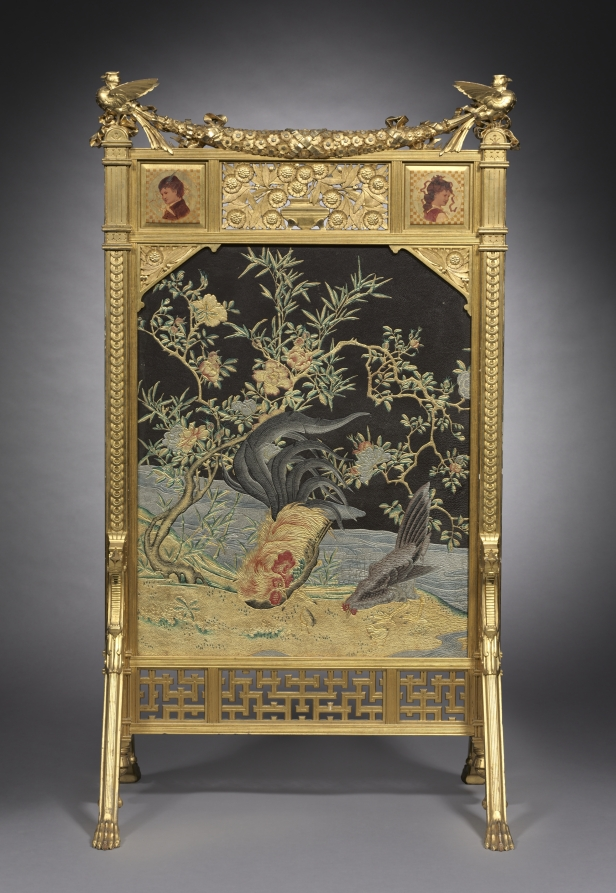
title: Fire Screen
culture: America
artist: firm of Herter Brothers (American)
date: c. 1878–80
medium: gilded wood, painted and gilded wood panels, brocaded silk, embossed paper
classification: Furniture and woodwork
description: During the 1870s the New York firm of Herter Brothers produced some of the most sophisticated and technically refined furniture made anywhere in the world at that date. Although the firm is known to have made a considerable quantity of gilded furniture, this fire screen is one of only a few examples to survive in good condition. The painted and gilded embossed panel of birds and flowers was likely made in Japan.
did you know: Produced by the New York decorating firm Herter Brothers, this screen would have been used to shield sitters from the heat of a fireplace.